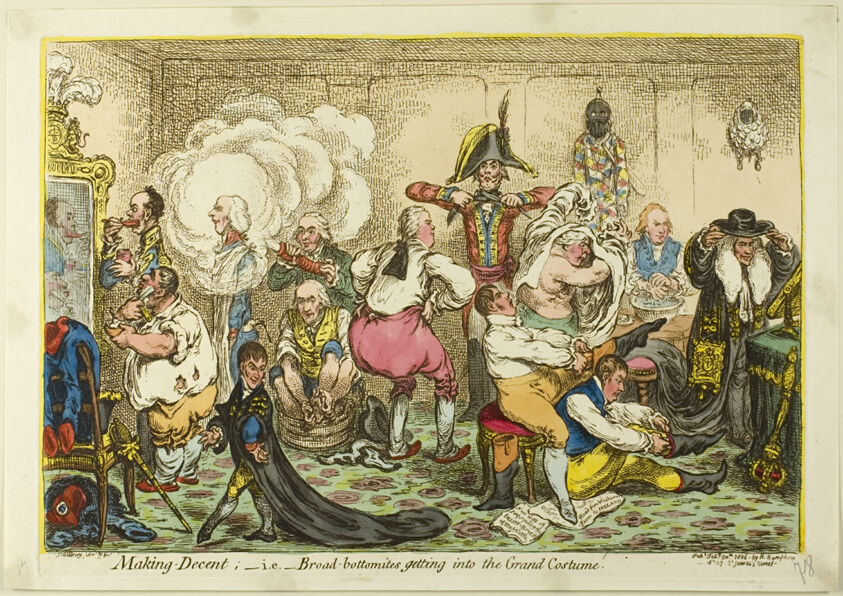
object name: Print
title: Making Decent; i.e. Broad-Bottomites Getting into the Grand Costume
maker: James Gillray (English, 1756-1815); published by Hannah Humphrey (English, c. 1745-1818)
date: published February 20, 1806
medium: Hand-colored etching on cream wove paper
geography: England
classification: etching; print; prints and drawing